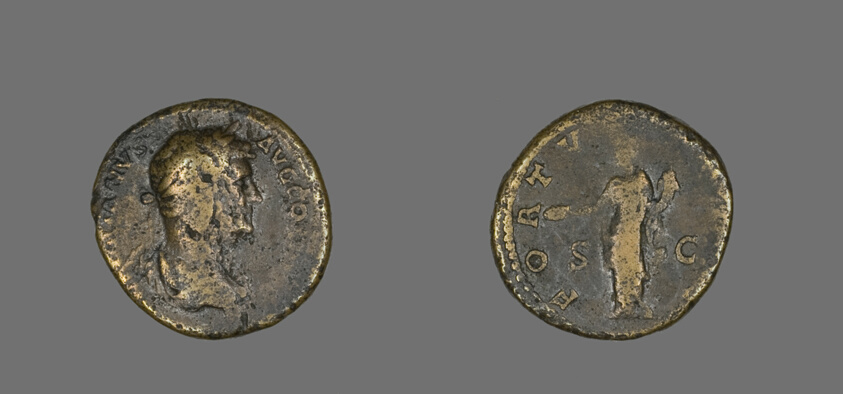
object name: Coin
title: Sestertius (Coin) Portraying Emperor Hadrian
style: roman (ancient, style or period), ancient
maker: Roman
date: 117-138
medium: Bronze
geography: Roman Empire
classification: coin; ancient art